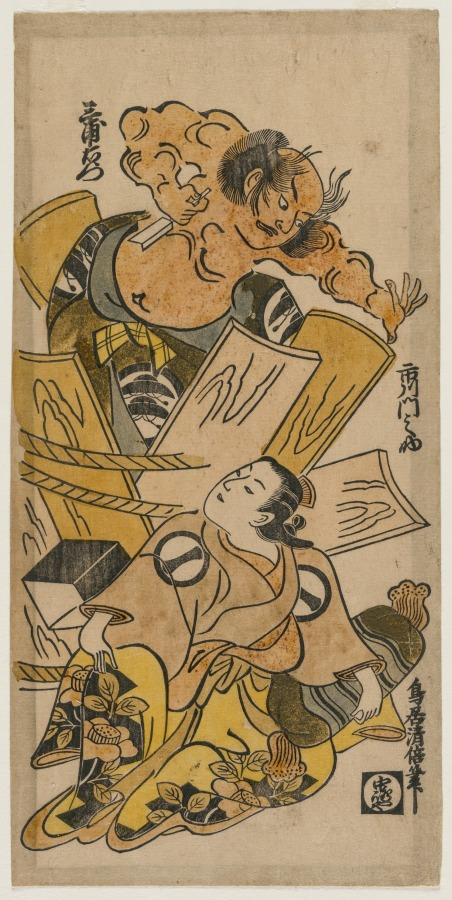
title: Ichikawa Monnosuke as a Courtesan and Nakajima Mioemon Bursting Out of a Barrel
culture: Japan, Edo period (1615–1868)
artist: Torii Kiyomasu (Japanese)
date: c. early 1720s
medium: color woodblock print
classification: Print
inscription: Signature: Torii Kiyomasu hitsu Publisher: Nakajimaya